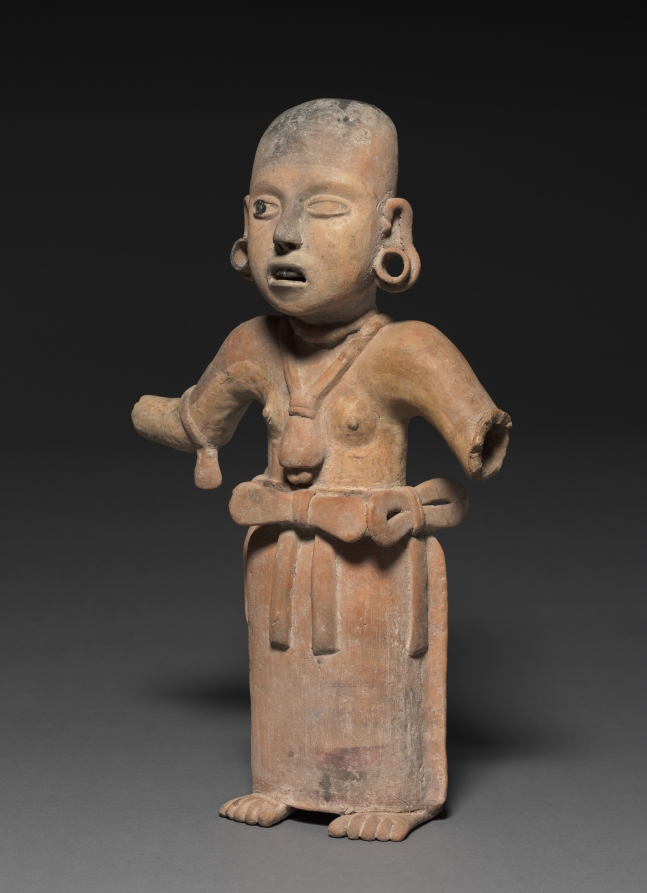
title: Female Figure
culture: Mexico, Southern Veracruz, Limon, Remojades Monumental Sculpture type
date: 200–500 CE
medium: pottery with burnished buff slip and asphalt paint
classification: Sculpture